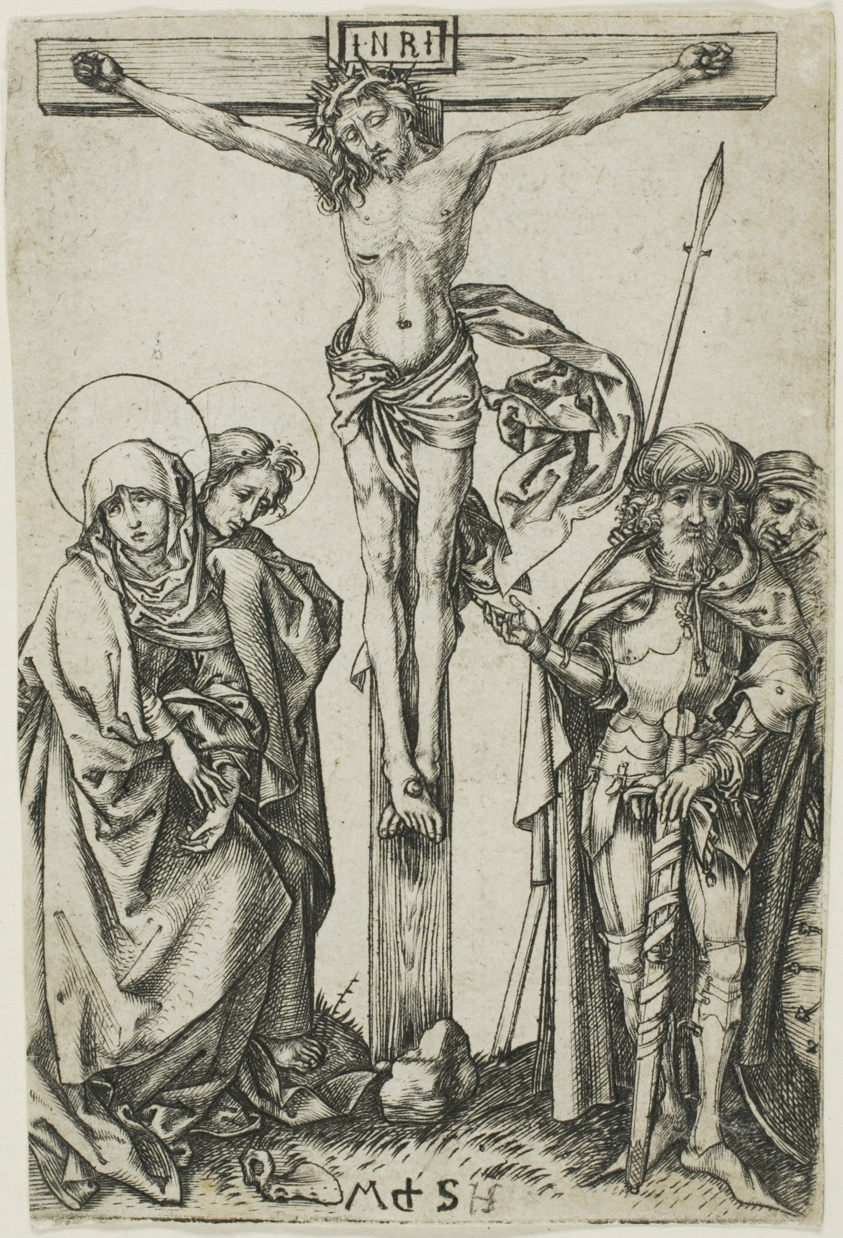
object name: Print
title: The Crucifixion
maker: Martin Schongauer (German, c. 1430/50-1491)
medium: Engraving on paper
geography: Germany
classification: engraving; print; prints and drawing